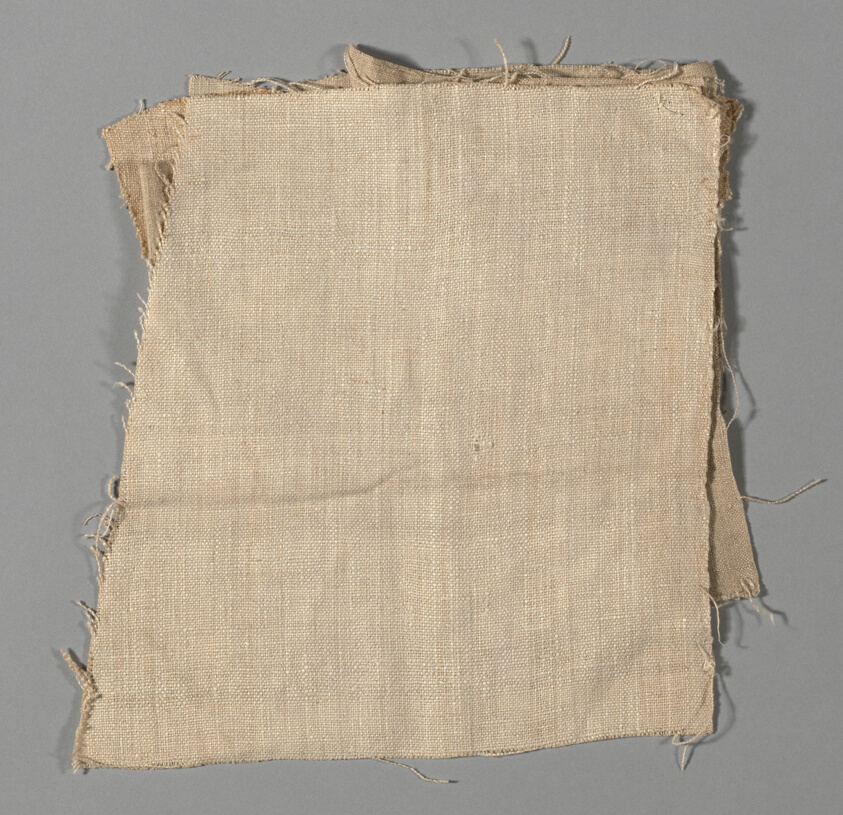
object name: Textile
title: Handwoven Linen Samples (5)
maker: United States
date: Early 19th century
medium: Five samples of plain woven white linen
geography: United States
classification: textile; weaving